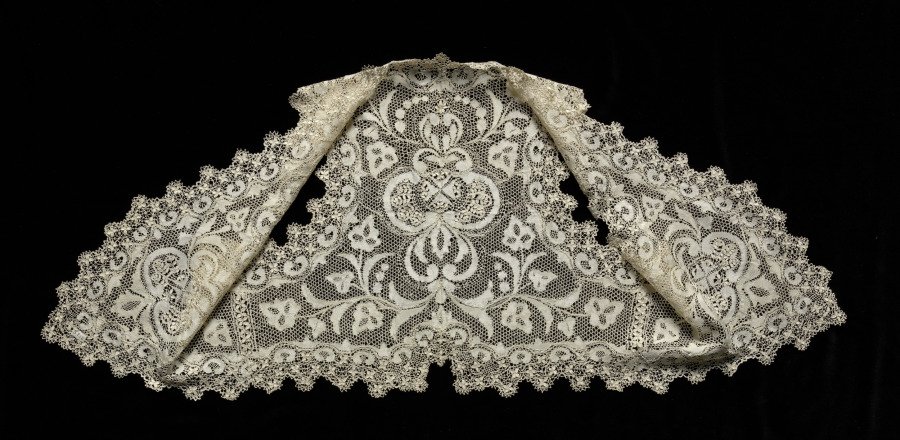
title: Bolero Style Lace Jacket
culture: Malta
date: 1800s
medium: Silk: bobbin lace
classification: Lace